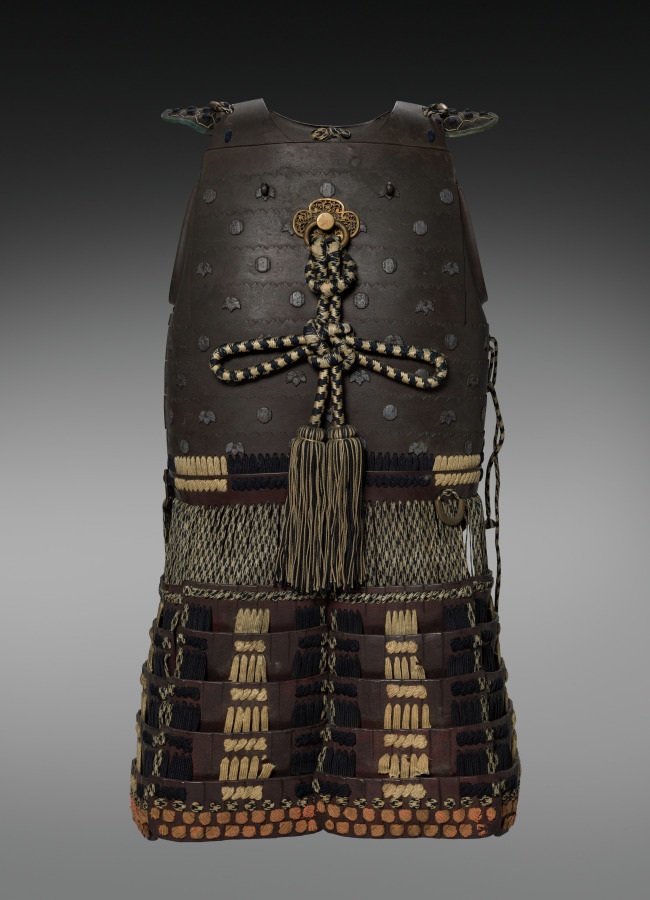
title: Chest Armor (Cuirass; Dō) and Fauld (Kusazuri)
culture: Japan, Edo period (1615–1868)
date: 1600s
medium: Iron, lacquer, textile (silk)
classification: Arms and Armor